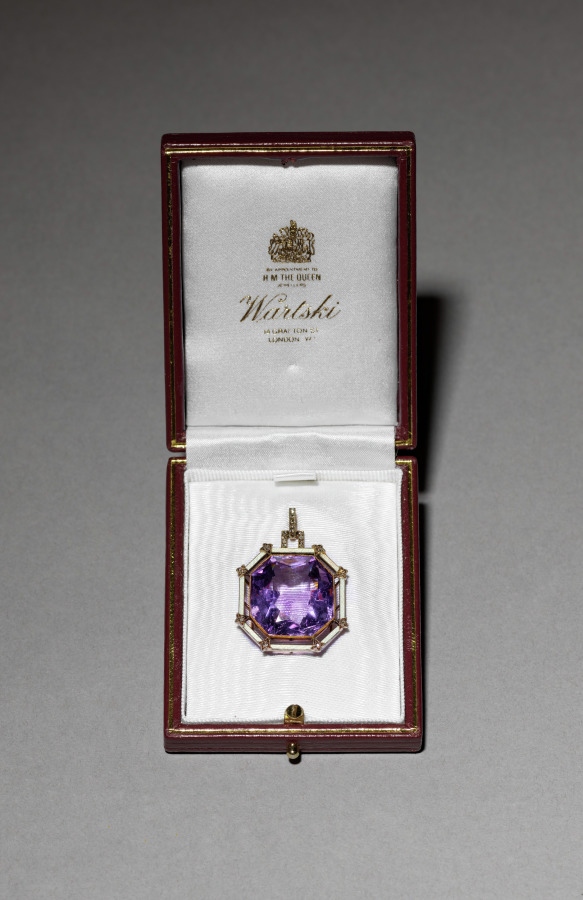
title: Pendant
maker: House of Fabergé (Russian, 1842–1918)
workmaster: Albert Holmström (Finnish, 1876–1925)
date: c. 1910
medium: amethyst, guilloché enamel, diamonds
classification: Jewelry